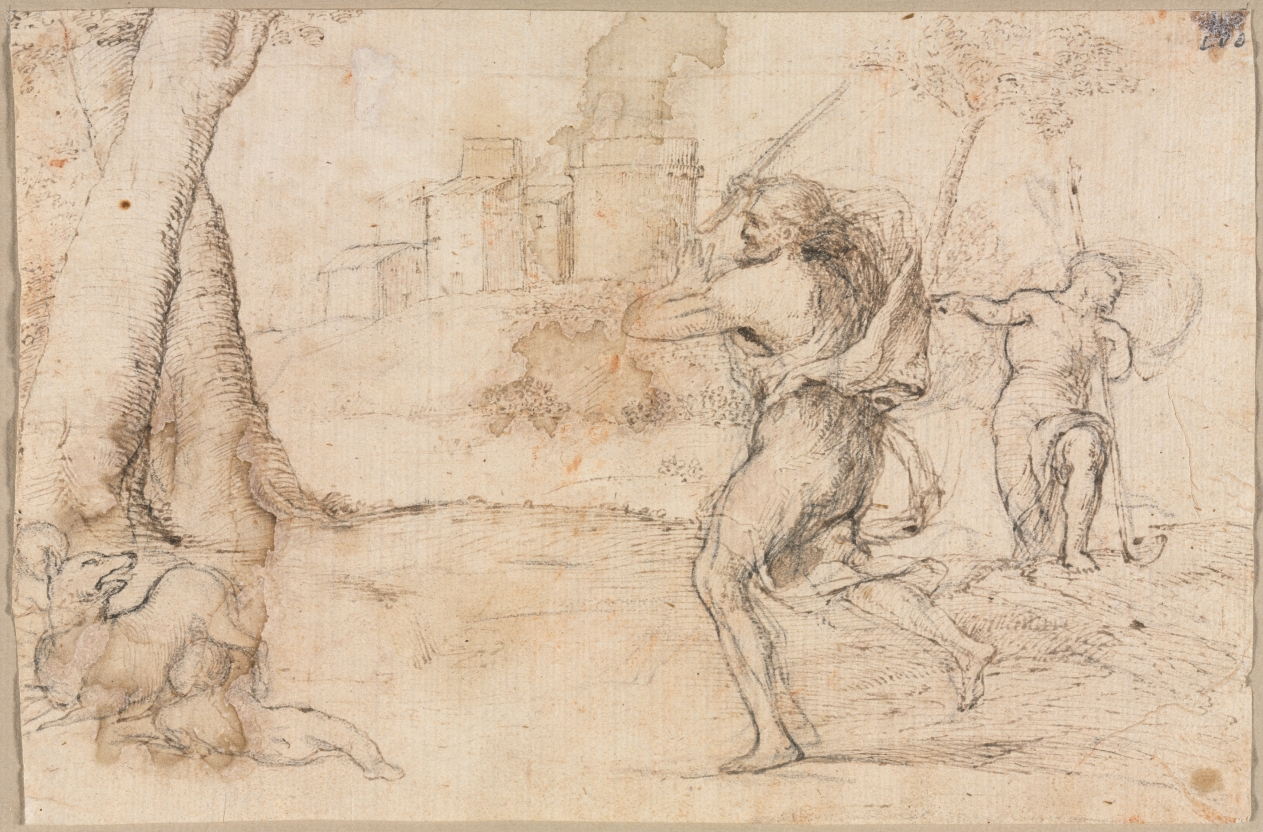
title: Romulus and Remus Found by Faustulus (recto)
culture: Italy, 16th century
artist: Romanino (Italian, 1484/87–1562)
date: c. 1535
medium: pen and brown ink, with point of brush and brown wash over black chalk (traces of red chalk and purple wash unrelated to composition)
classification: Drawing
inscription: upper right, in black ink: [2?]00